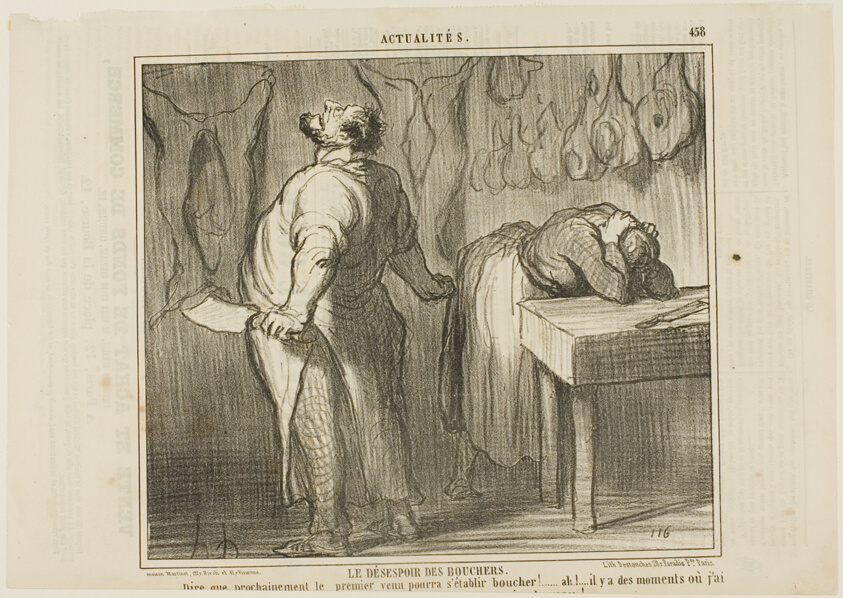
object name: Print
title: The Despair of the Butcher. “- Just imagine: Anybody can establish himself as a butcher! Ah! There are moments when I feel like taking my meat chopper and cutting myself in two halves like a simple veal,” plate 458 from Actualités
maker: Honoré Victorin Daumier; French, 1808-1879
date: 1857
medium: Lithograph in black on buff wove paper, with letterpress verso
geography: France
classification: lithograph; print; prints and drawing